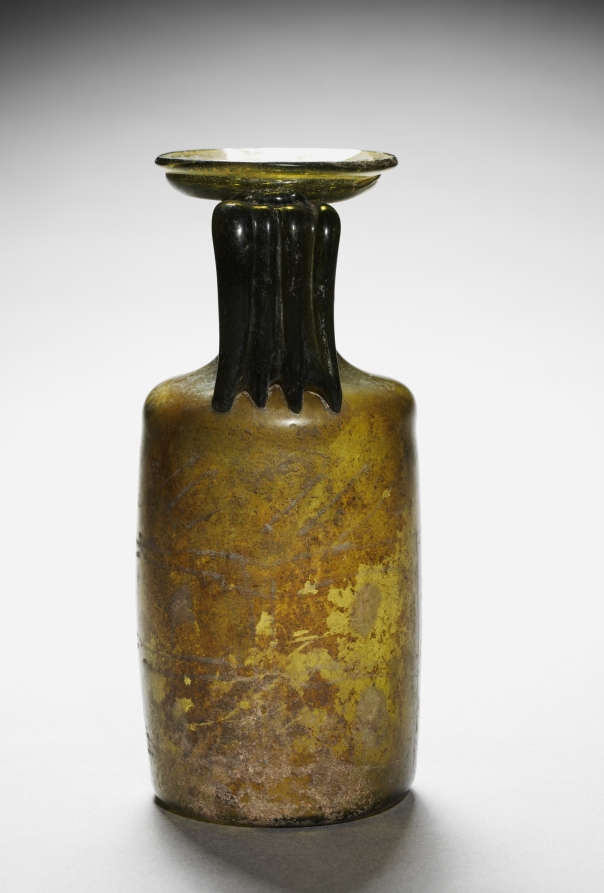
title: Pitcher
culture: Syro-Palestinian, Roman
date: 200–400 CE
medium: glass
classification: Glass